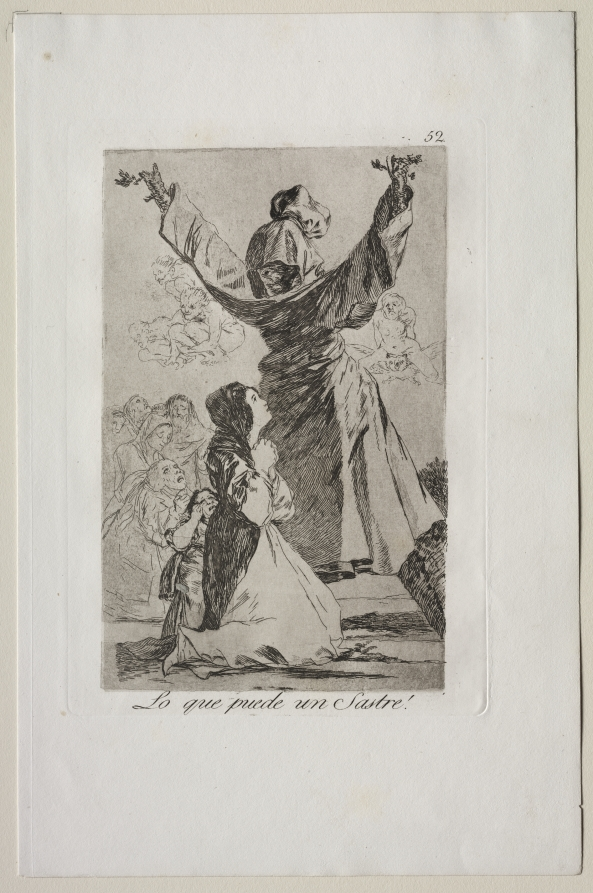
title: What a Tailor Can Do!, Plate 52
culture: Spain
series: Los Caprichos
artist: Francisco de Goya (Spanish, 1746–1828)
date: 1799, printed c. 1855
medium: etching and aquatint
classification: Print